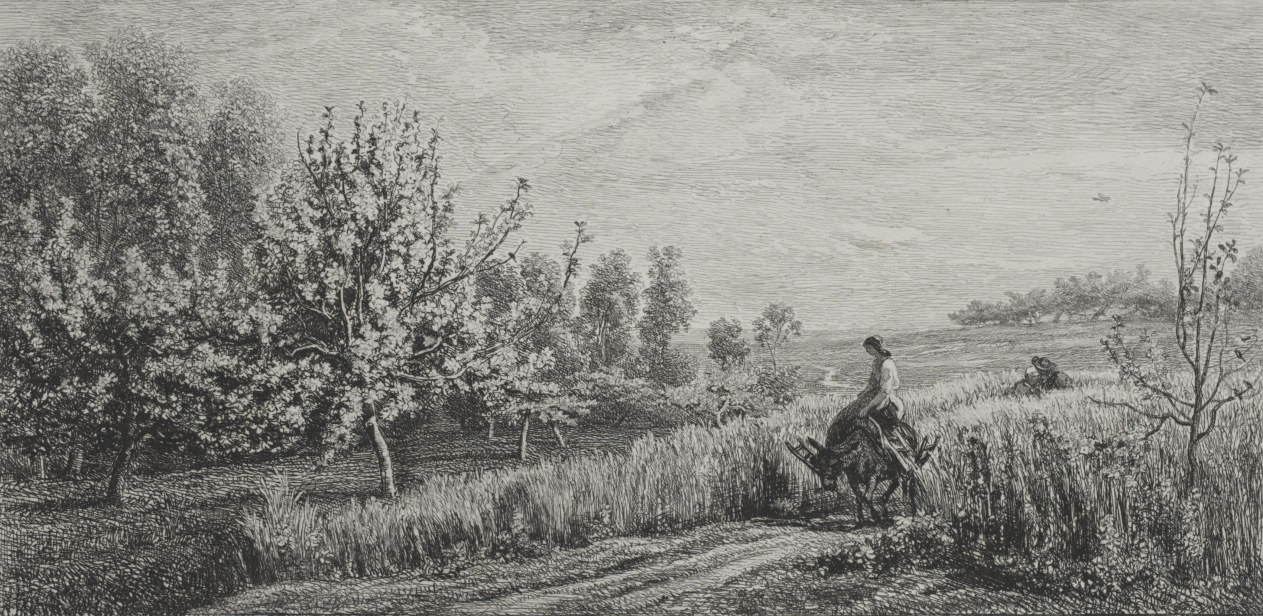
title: Springtime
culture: France, 19th century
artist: Charles François Daubigny (French, 1817–1878)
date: 1857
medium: etching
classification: Print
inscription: lower left, printed: Daubigny del. et Sc.; lower right, printed: Montmartre Imp. Delâtre r. Nicolet 10; lower center, printed: Le Printemps